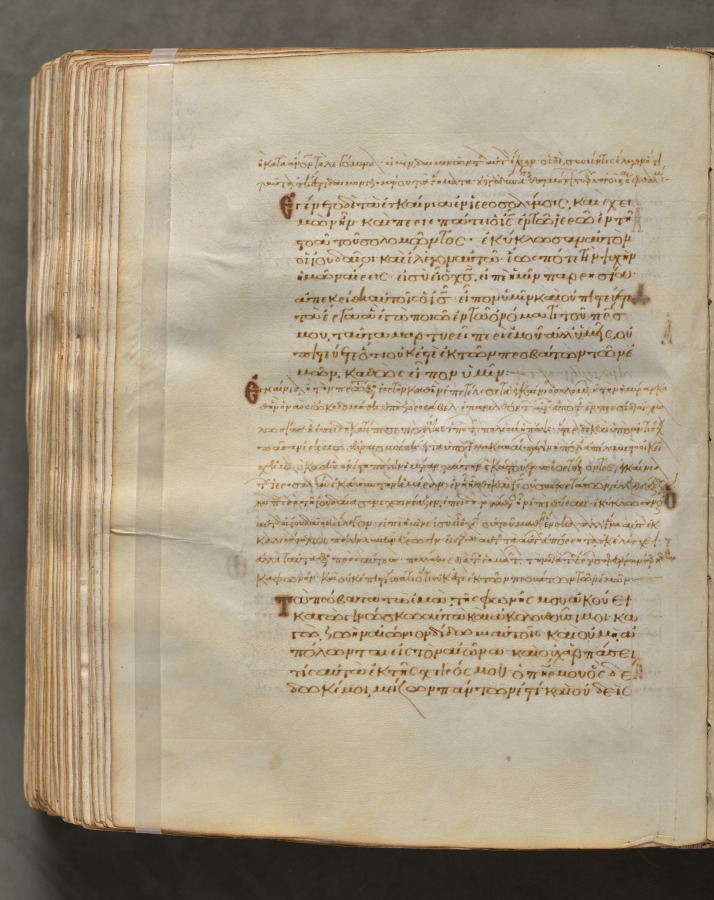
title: Text, folio 374 (verso), from a Gospel Book with Commentaries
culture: Byzantium, Constantinople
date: c. 1000–1100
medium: ink, tempera, and gold on vellum; leather binding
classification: Bound Volume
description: Each of the four gospels in this book opens on a page with brilliantly illuminated borders depicting the author of the text as well as birds—principally peacocks, symbols of the immortality of the soul—and fountains, representing the fountain of life and the salvation of the soul. This volume consists of 428 leaves with texts in Greek. Its level of sophistication suggests that it was probably written and decorated in a monastery in Constantinople.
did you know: Gospel books were carried in procession through Byzantine churches.